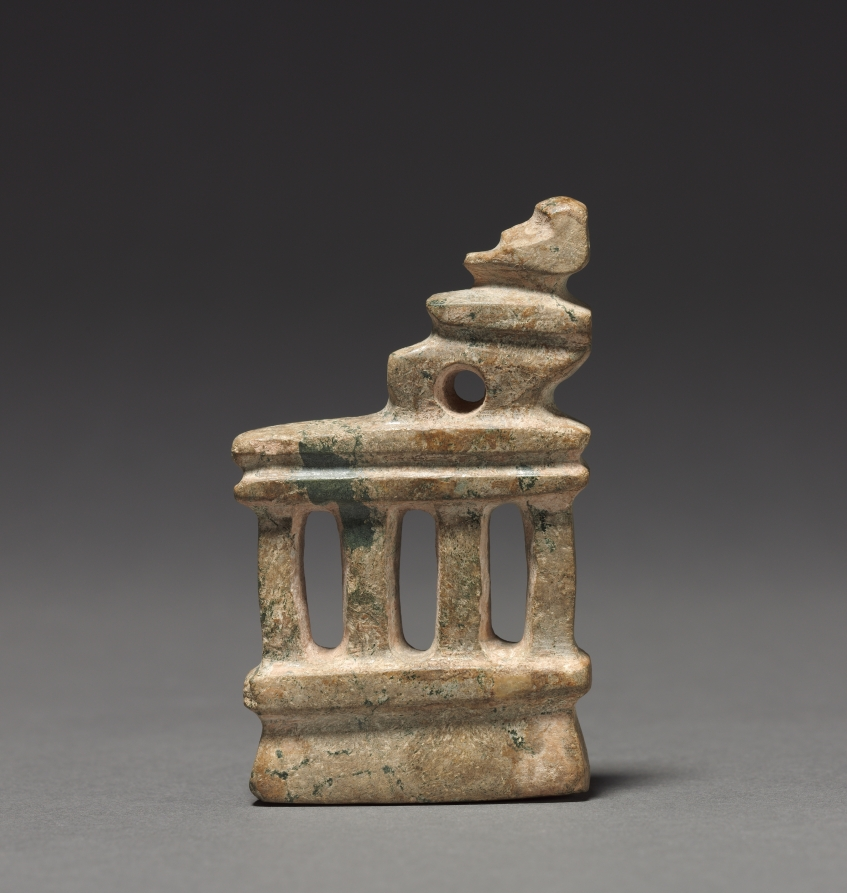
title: Architectural Model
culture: Mesoamerica, Mexico, Guerrero, Mezcala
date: 100 BCE–300 CE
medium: serpentine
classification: Sculpture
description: The Mezcala style takes its name from a river in its homeland, the Guerrero region of western Mexico. The style is known for small-scale stone sculptures including architectural “models” characterized by sleek abstraction. Because comparisons to actual architecture in the Mezcala region are scarce, it is not known whether the models refer to temples, houses, or underground funerary structures.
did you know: The Mezcala style was first recognized and defined in 1956.